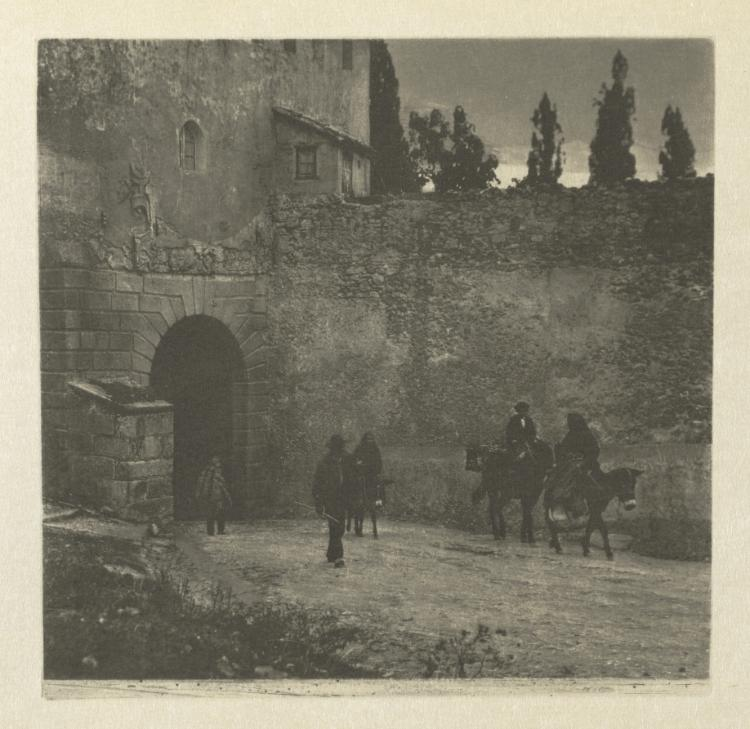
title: Camera Work: A Gateway - Segovia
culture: England, 20th century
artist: J. Craig Annan (British, 1864–1946)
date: 1914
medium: photogravure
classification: Bound Volume